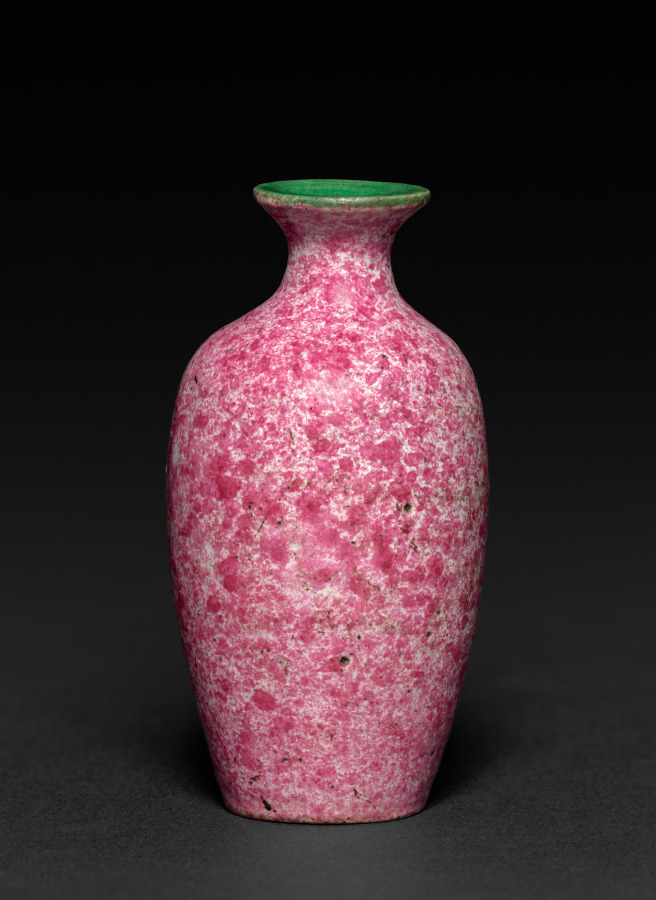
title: Miniature Vase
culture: China, Qing dynasty (1644–1911), Qianlong reign (1736–95)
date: 1736–95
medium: porcelain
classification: Ceramic